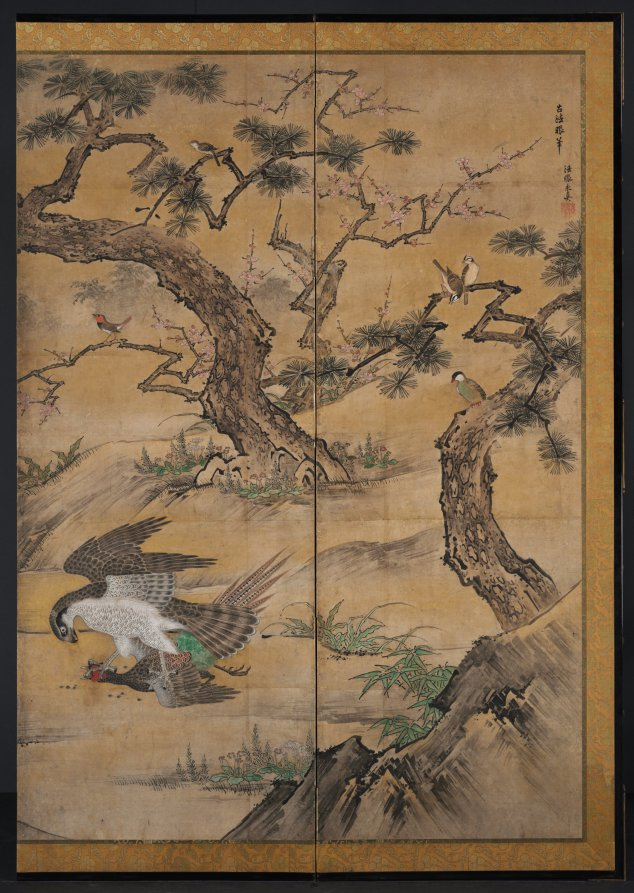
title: Birds and Flowers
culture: Japan, Momoyama period (1573–1615)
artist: attributed to Kano Shōei (Japanese, 1519–1592)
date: late 1500s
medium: One of a pair of six-panel folding screens; ink, color, and gold on paper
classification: Painting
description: The landscape depicted in this pair of screens follows a seasonal progression from right to left, starting with the blossoming plum of early spring and ending with late autumn peonies. A variety of smaller birds are positioned throughout the scene, and a trio of swimming ducks is bracketed by early summer irises and early autumn bellflowers at the center. While some raptors (birds of prey) terrorize a pheasant and an egret (a waterfowl) to the right, a peacock and peahen converse to the left. Hawks are associated with military prowess, while the peafowl suggest cultural prestige.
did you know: Military class patrons frequently requested scenes depicting predation, such as hunting scenes that were inserted as additional subject matter in otherwise tranquil vistas celebrating flora and fauna.